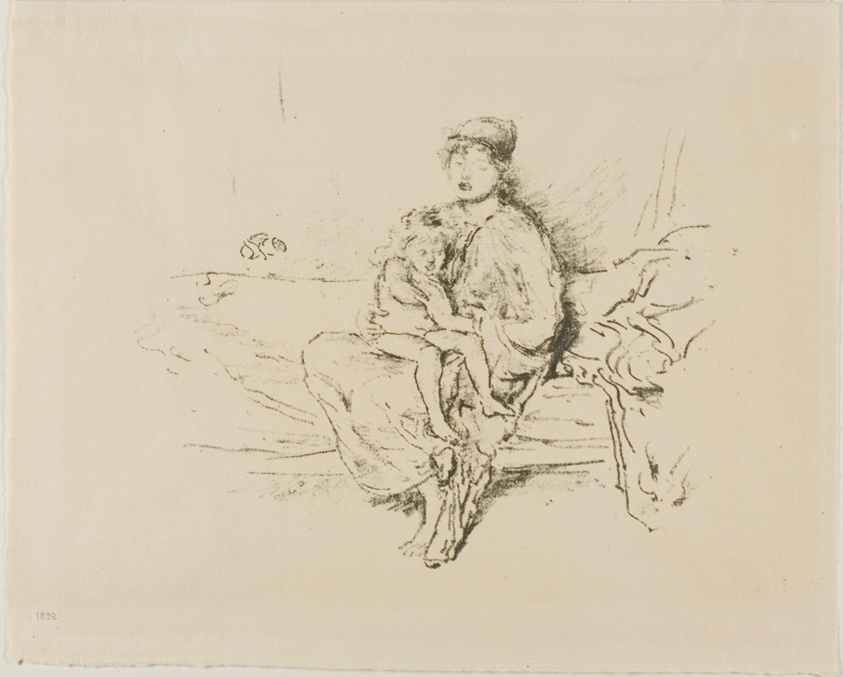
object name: Print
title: Mother and Child, No. 2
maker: James McNeill Whistler (American, 1834-1903)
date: 1891/95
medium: Transfer lithograph in black on cream laid paper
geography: United States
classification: transfer lithograph; lithograph; print; prints and drawing; paper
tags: mothers, children